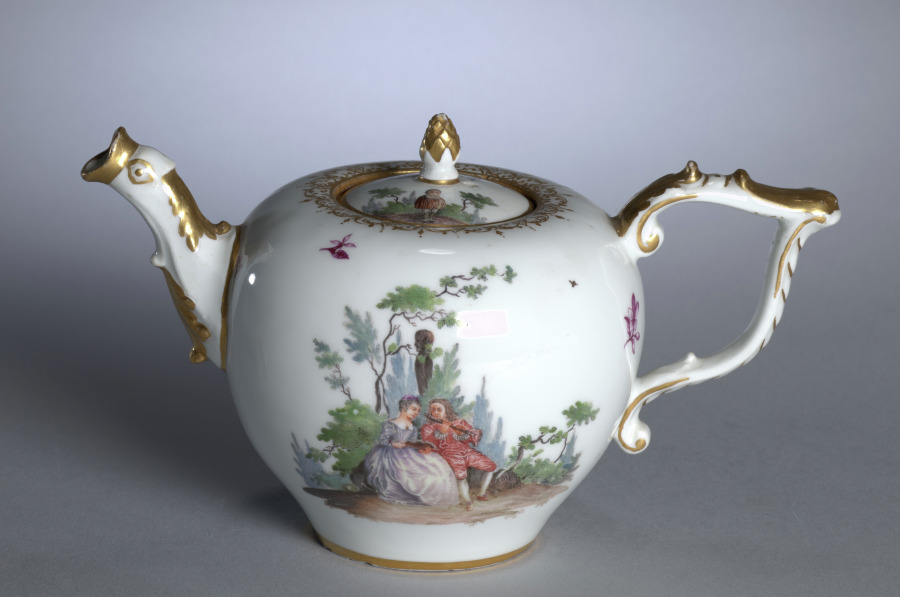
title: Teapot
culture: Germany, Meissen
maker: Meissen Porcelain Factory (German, est. c. 1710)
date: c. 1750–70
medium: porcelain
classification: Ceramic